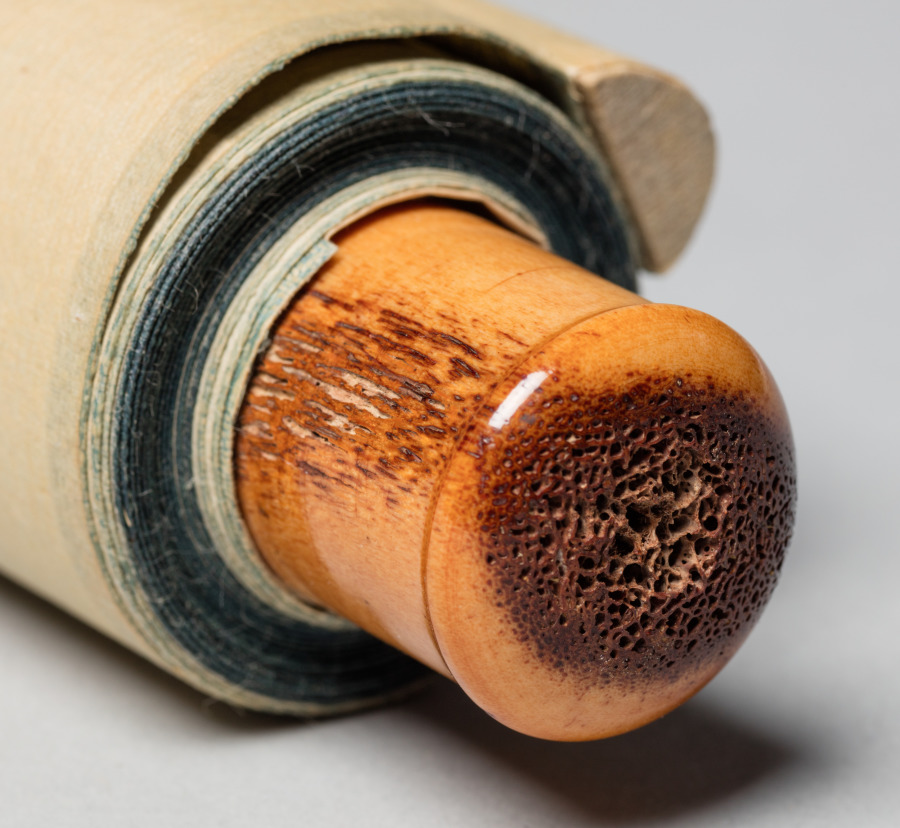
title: Landscape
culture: Japan, Muromachi period (1392–1573)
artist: attributed to Kenkō Shōkei (Japanese, active 1478–1506)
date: late 1400s–early 1500s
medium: hanging scroll, ink and light color on paper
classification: Painting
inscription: inscription above signed Shō'u Kojin; calligraphy by the Shokōji priest Tōgan Zuisen 桃源瑞仙 (1430–89)